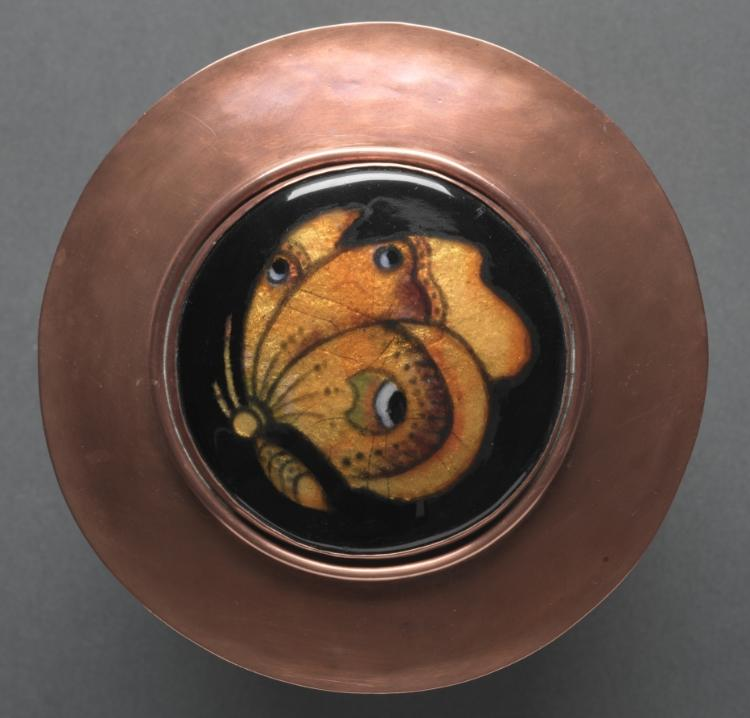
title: Covered Bowl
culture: America, Ohio, Cleveland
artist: Kenneth F. Bates (American, Cleveland, 1904–1994)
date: 1927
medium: copper and enamel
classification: Enamel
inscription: incised on bottom: "Kenneth F. Bates 1927."